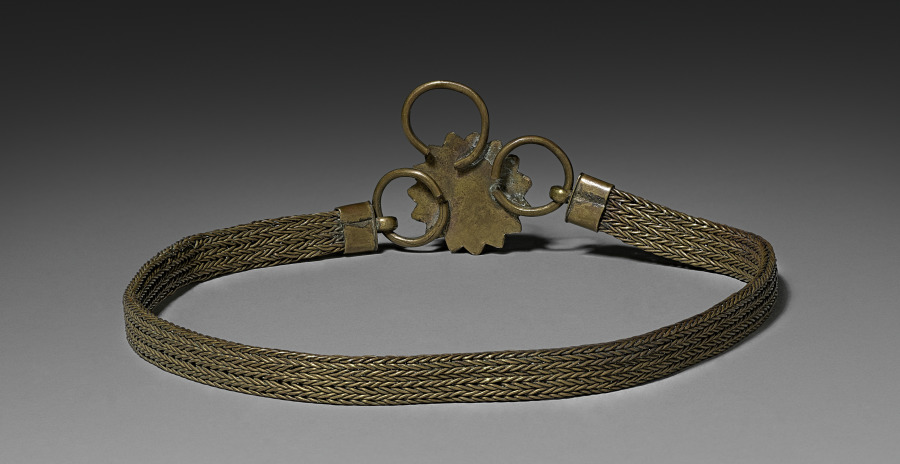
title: Chain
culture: India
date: 1800s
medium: brass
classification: Jewelry